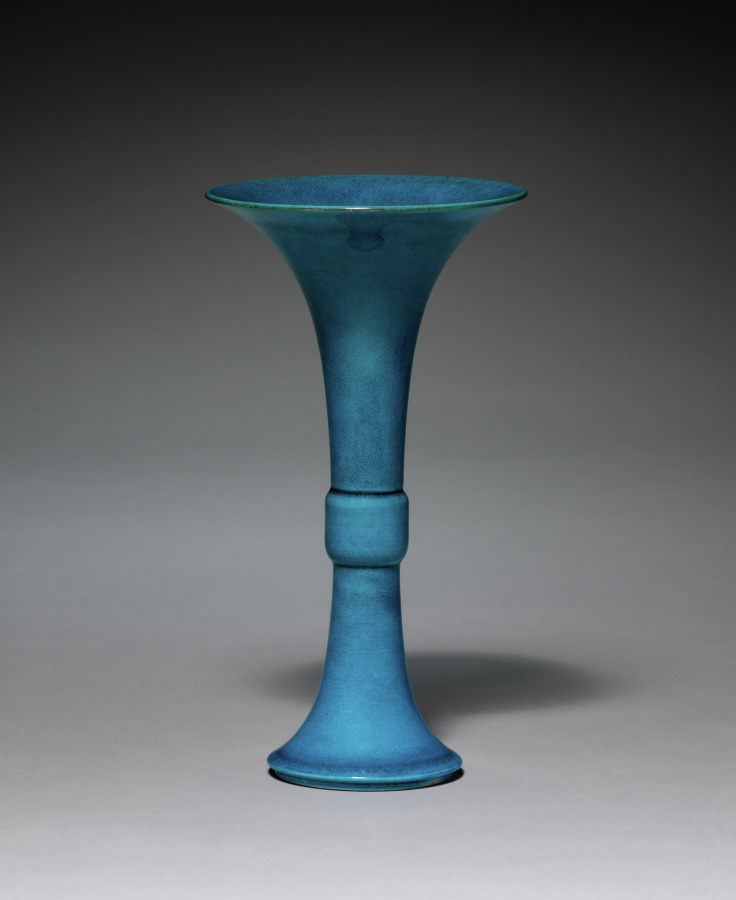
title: Beaker Vase in Form of Archaic Gu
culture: China, Jiangxi province, Jingdezhen kilns, Qing dynasty (1644-1911), Kangxi mark and reign (1662-1722)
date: 1662–1722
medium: porcelain with peacock-blue glaze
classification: Ceramic